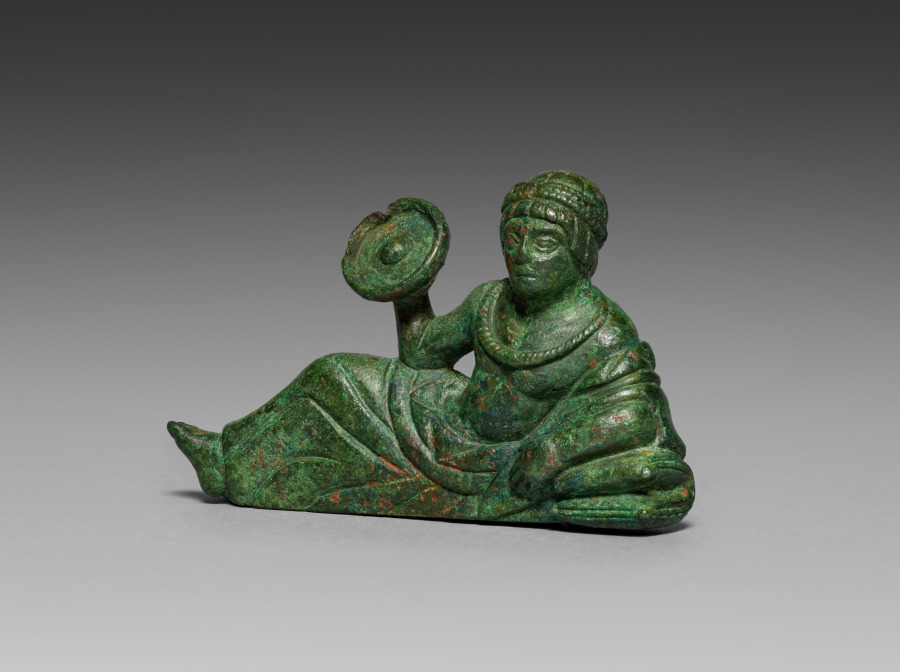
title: Vessel Ornament of Banqueter Holding an Omphalos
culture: Etruscan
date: probably 400–375 BCE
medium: bronze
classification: Sculpture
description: This bronze banqueter figurine was one of six once adorning the rim of a large basin, now lost. Cast in molds with individualized details, most have grooves on their underside to attach to the basin. Minute traces of gilding remain on areas of clothing and skin (mostly visible only under magnification), suggesting that they may have been completely gilded. Two handles in the form of hippocampi, horses with serpentine tails, also belonged to the basin and are now displayed at the Michael C. Carlos Museum at Emory University. The basin may have been used to hold liquid for a banquet, or was perhaps funerary. This bronze figurine holds a phiale mesomphalos, a shallow wine bowl, in his right hand. The vessel is tilted upward as if to spill its contents, perhaps as a libation for the gods. Traces of gilding remain in the corners of the phiale mesomphalos and the figurine’s drapery. His left hand rests against a fold of cloth slipping over his shoulder. A garland lies on his bare chest and another crowns his head. The banqueter shares many similarities with 1987.158.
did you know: Though primarily associated with dedicatory libations, the phiale mesomphalos could also be used for drinking.